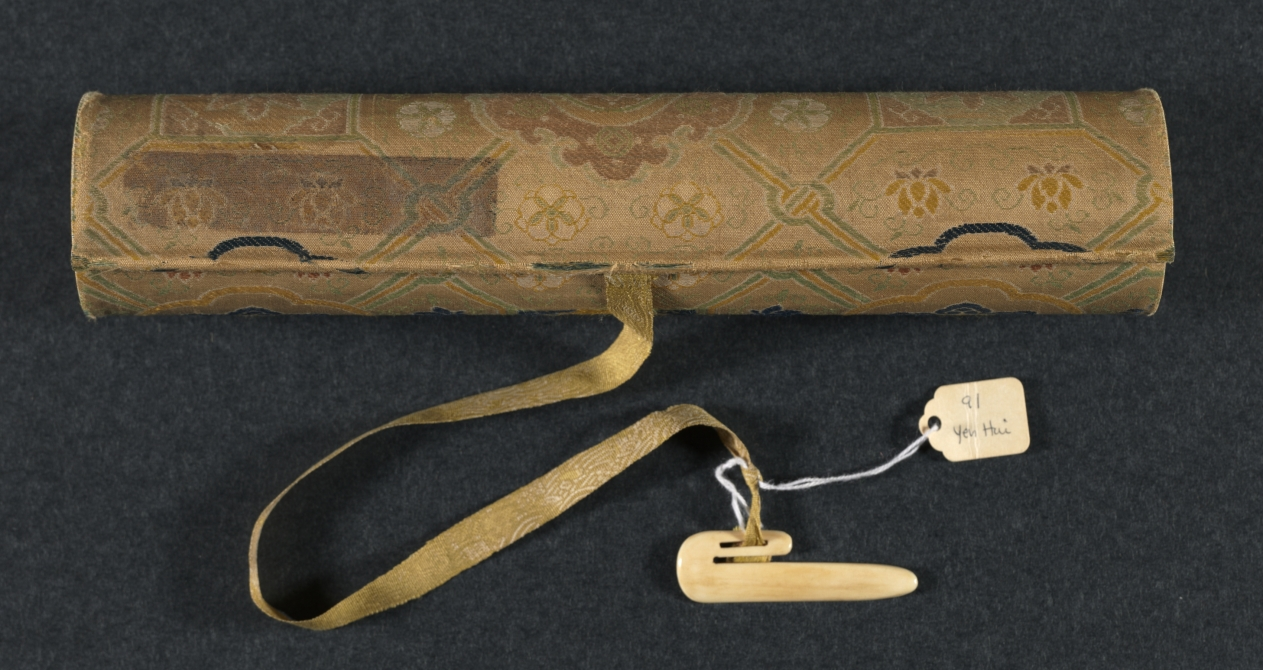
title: The Lantern Night Excursion of Zhong Kui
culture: China, Yuan dynasty (1271-1368)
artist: Yan Hui (Chinese, active 1270–1310)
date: late 1200s–early 1300s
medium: handscroll; ink and slight color on silk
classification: Painting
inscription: Artist's signature [and probable seal]: Yan Qiuyue 顏秋月 Title on frontispiece and 1 seal of Niu Shuyu 鈕樹玉 (1760–1827): Qiuyue mohuan 秋月墨幻 [Qiuyue's Ink Fantasy]. 31 additional seals: 2 of Yang Shiqi 楊士奇 (1365–1444); 2 of An Guo 安國 (1481–1534); 8 of Xiang Yuanbian 項元汴 (1525–1590); 2 of Geng Zhaozhong 耿昭忠 (1640–1686); 4 of Pu Tung 溥侗 (1870–1952); 7 of Tan Jing 譚敬 (1911–1991); 1 of Liu Ting-chih (20th c.); 5 unidentified.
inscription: An inscription by Zizhi Shanren 紫芝山人 [probably Jiang Hui 蔣惠], dated 1389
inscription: An inscription by Wu Kuan 吳寬 (1436–1504)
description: Here, the demon queller Zhong Kui leads a nightly procession of street entertainers with bare, muscular bodies and demonic faces. Some wear shabby clothes, and all perform stunts and tricks to astound and scare the viewer. In fact, a New Year custom in cities of southeast China had the poor, disguised as demons, process through the streets and play their tricks to clear households of evil spirits and welcome the spring. From right to left, a demonic figure leads the procession and beats a drum; another lifts a large rock; one stands on his hands trying to drink; one balances a jar on his elbow; three hold and wield weapons; one carries a folded chair covered by a cow’s skin; another holds Zhong Kui’s qin (zither), books, brush, and inkstone. At the end of the scroll, two figures offer a cup and bottle of wine to Zhong Kui, who lifts his hand in command.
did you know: Zhong Kui was an ancient ghostbuster.